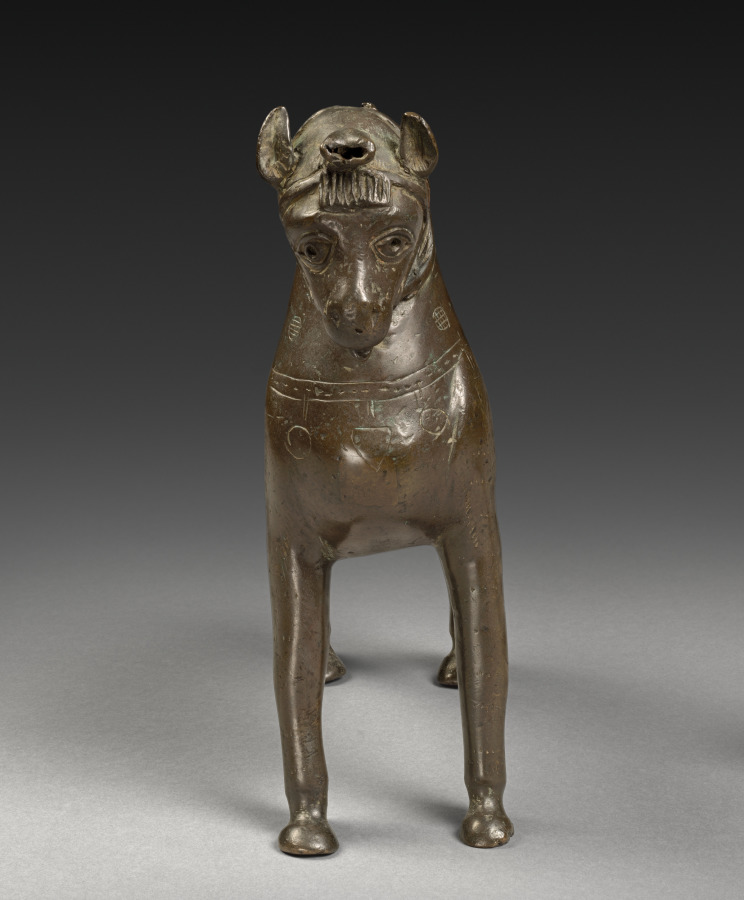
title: Aquamanile: Saddled Horse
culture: North Germany, Lower Saxony (?), 14th century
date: c. 1250–1300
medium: copper alloy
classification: Sculpture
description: Aquamanilia, from the Latin aqua meaning water and manus meaning hands, were hollow cast vessels used for hand washing. Although originally intended for liturgical use they became a common sight in the homes of the nobility in the 1200s and 1300s. Often filled with scented water, these vessels were used to wash hands just before and after eating a meal. An accompanying catch basin would have caught the water as it was being poured. Here we see a proud and alert dappled gray warhorse, highly prized in the medieval period. The saddled but riderless form is rare; other popular aquamanilia include lions, dragons, griffins, and human heads.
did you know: The pattern of crosshatched circles on the surface suggests that the horse is a dappled gray warhorse, a prized possession in the period.